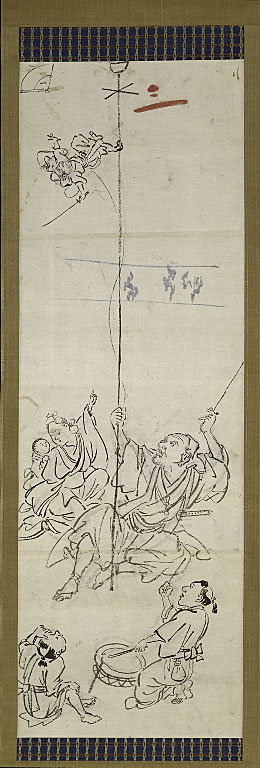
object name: Painting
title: Monkey Trainer, one of six sketches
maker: Kawanabe Kyosai; Japanese, 1831-1889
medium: Hanging scroll; ink on paper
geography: Japan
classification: hanging scroll; painting; asian art